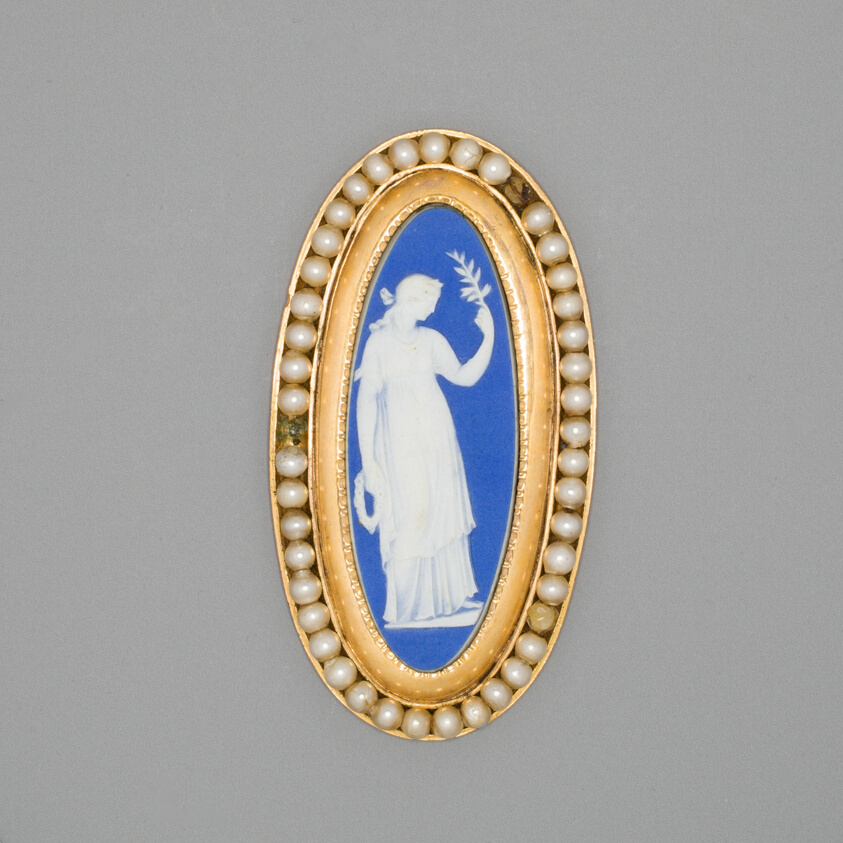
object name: Ceramics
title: Medallion with Peace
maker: Wedgwood Manufactory (England, founded 1759)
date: Late 18th century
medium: Stoneware (jasperware)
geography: Burslem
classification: sculpture; stoneware; european decorative arts; ceramics